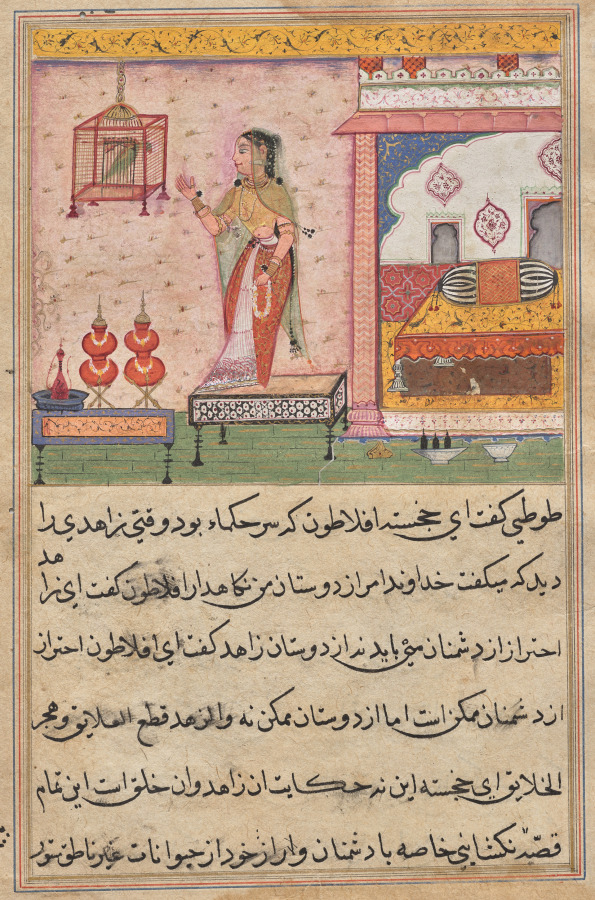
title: The Parrot Addresses Khujasta at the Beginning of the Twenty-third Night, from a Tuti-nama (Tales of a Parrot)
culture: Mughal India, court of Akbar (reigned 1556–1605)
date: c. 1560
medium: gum tempera, ink, and gold on paper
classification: Painting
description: On the twenty-third of fifty-two nights, Tuti the wise, talking parrot tells Khujasta the story of Kamjuy the wife of a raja, a group of laughing fish, and a boy who was born without a father. A stool painted beneath Khujasta’s feet negates the appearance that she is floating.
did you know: The parrot’s cage was originally painted gold.